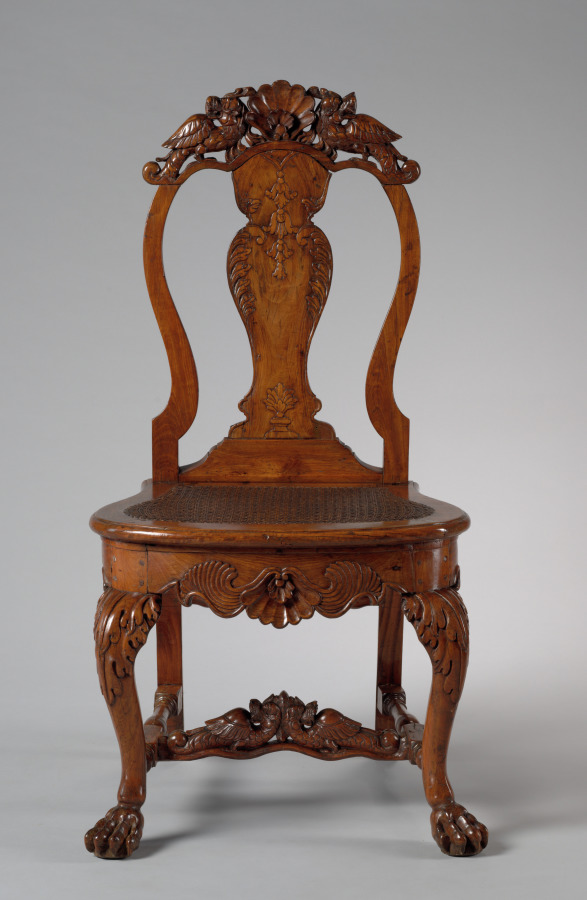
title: Side Chair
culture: Netherlands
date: 1705–15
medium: tulipwood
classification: Furniture and woodwork